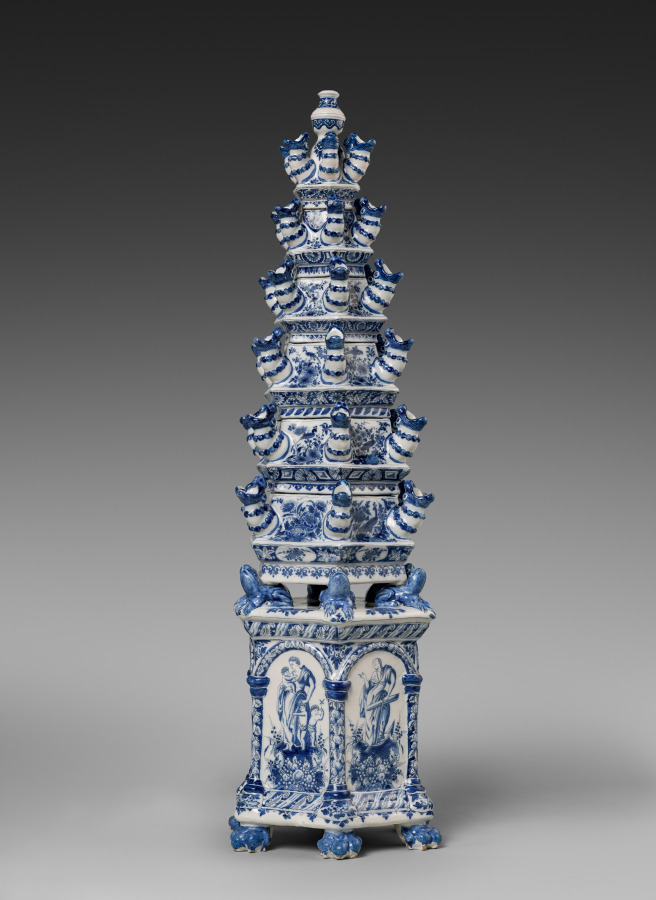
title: Flower Pyramid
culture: Netherlands, Holland, Delft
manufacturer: Adrianus Kocx (Dutch, active 1686–1701)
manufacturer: De Grieksche A (The Greek A) Factory (Netherlands, 1658–1811)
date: c. 1690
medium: Tin-glazed earthenware, painted in blue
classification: Ceramic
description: Allegorical figures representing Faith, Hope, and Love decorate the base of this pyramid, on which rest six tiers with spouts where flowers can be placed. Flower pyramids are among the most complex and luxurious types of ceramics produced in Delft in the late 1600s. This example was made in the Greek A Factory, owned by Adrianus Kocx. During his tenure, the factory became the most prestigious of Delft potteries and received commissions from Queen Mary II, who ruled over England, Scotland, and Ireland together with her husband, William III. She contributed to the international spread of the fashion for Delft ceramics.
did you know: The iconic blue-and-white ceramics from Delft originated as an attempt to copy Chinese porcelain.